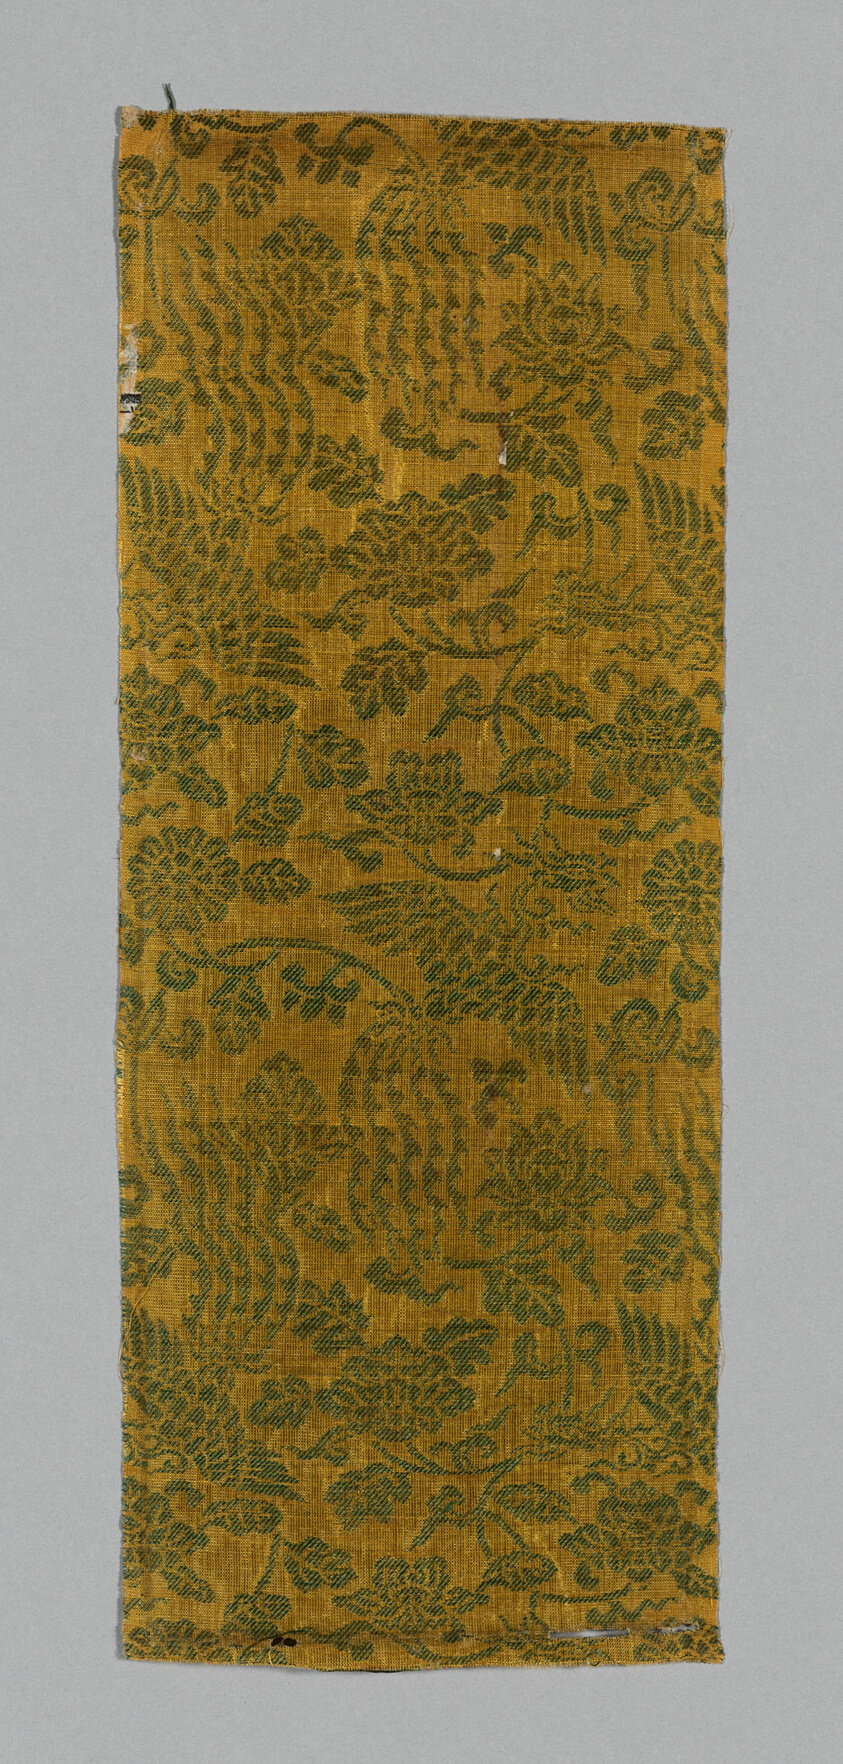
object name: Textile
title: Sutra Cover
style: ming, Chinese (culture or style), East Asian, asian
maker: China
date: Ming dynasty (1368–1644), c. 1590s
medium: Silk, plain weave with supplementary patterning wefts bound in weft-float faced 1:3 'Z' twill interlacings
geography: China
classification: textile; weaving